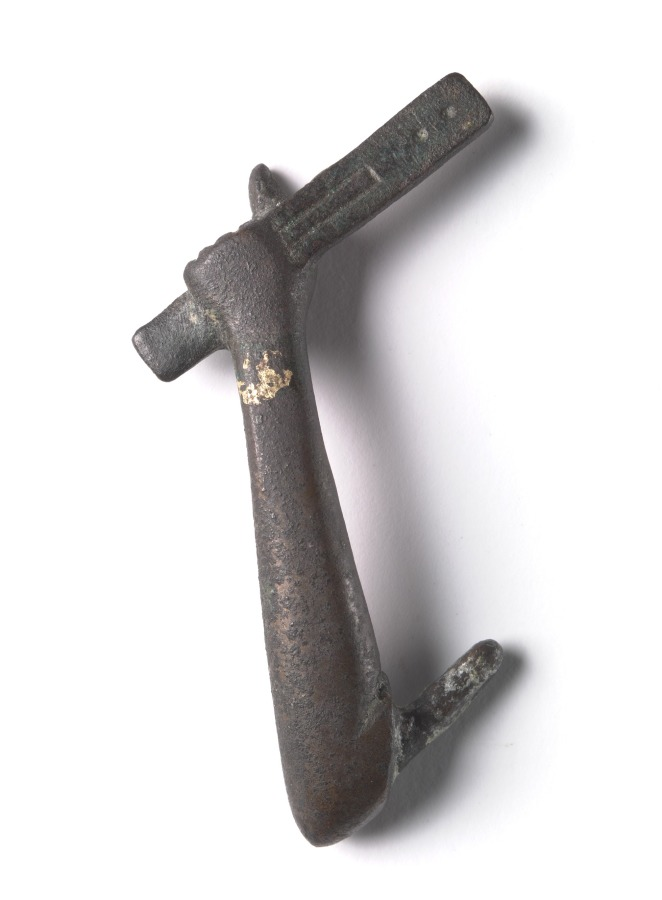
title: Bronze Mount from a "Shawabty Bundle": Arm with Scribe's Palette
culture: Egypt, Thebes, Wadi Qubbanet el-Qirud, New Kingdom (1540–1069 BCE), Dynasties 18–19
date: c. 1336–1256 BCE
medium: bronze with traces of gilding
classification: Funerary Equipment